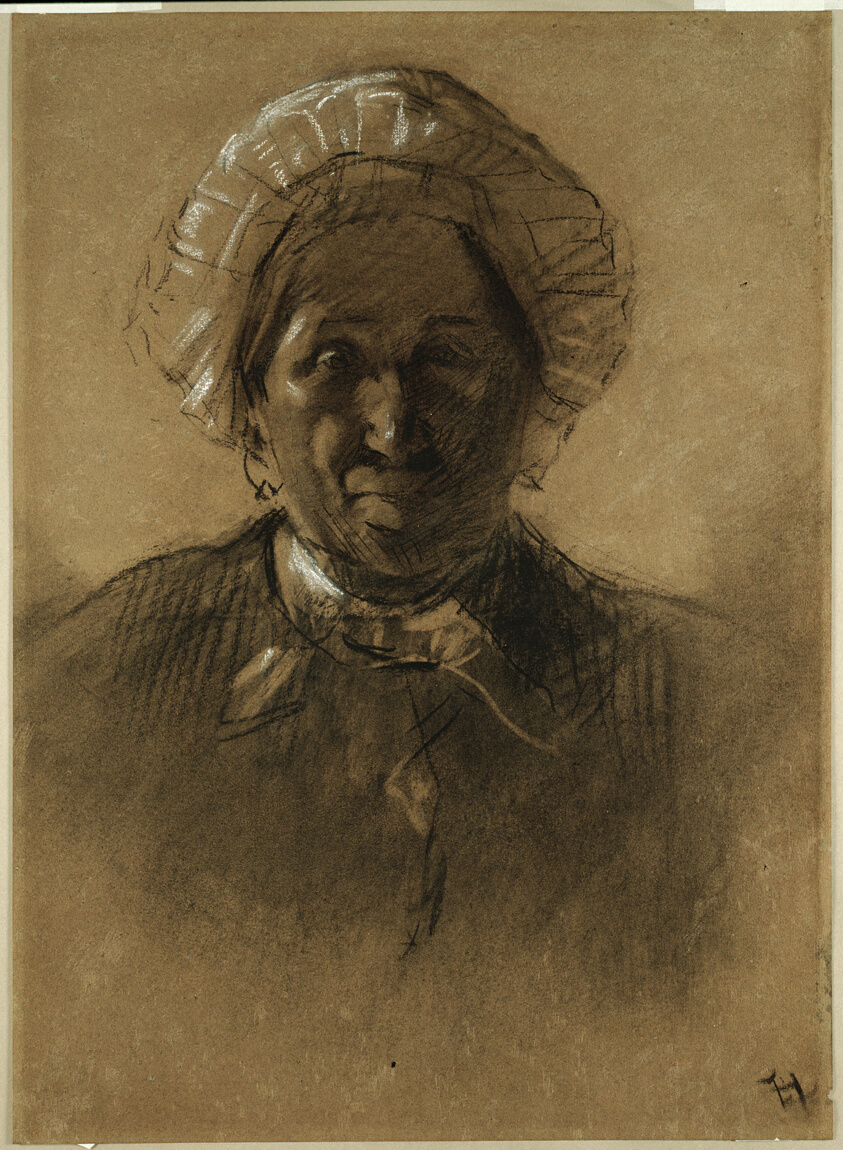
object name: Drawing and Watercolor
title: Old Woman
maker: Henri de Toulouse-Lautrec (French, 1864-1901)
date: 1882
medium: Charcoal, with black chalk, stumping, and erasing, heightened with white chalk, on brown laid paper with blue fibers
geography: France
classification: charcoal; drawings (visual works); prints and drawing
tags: women, people, prints and drawings, peasants